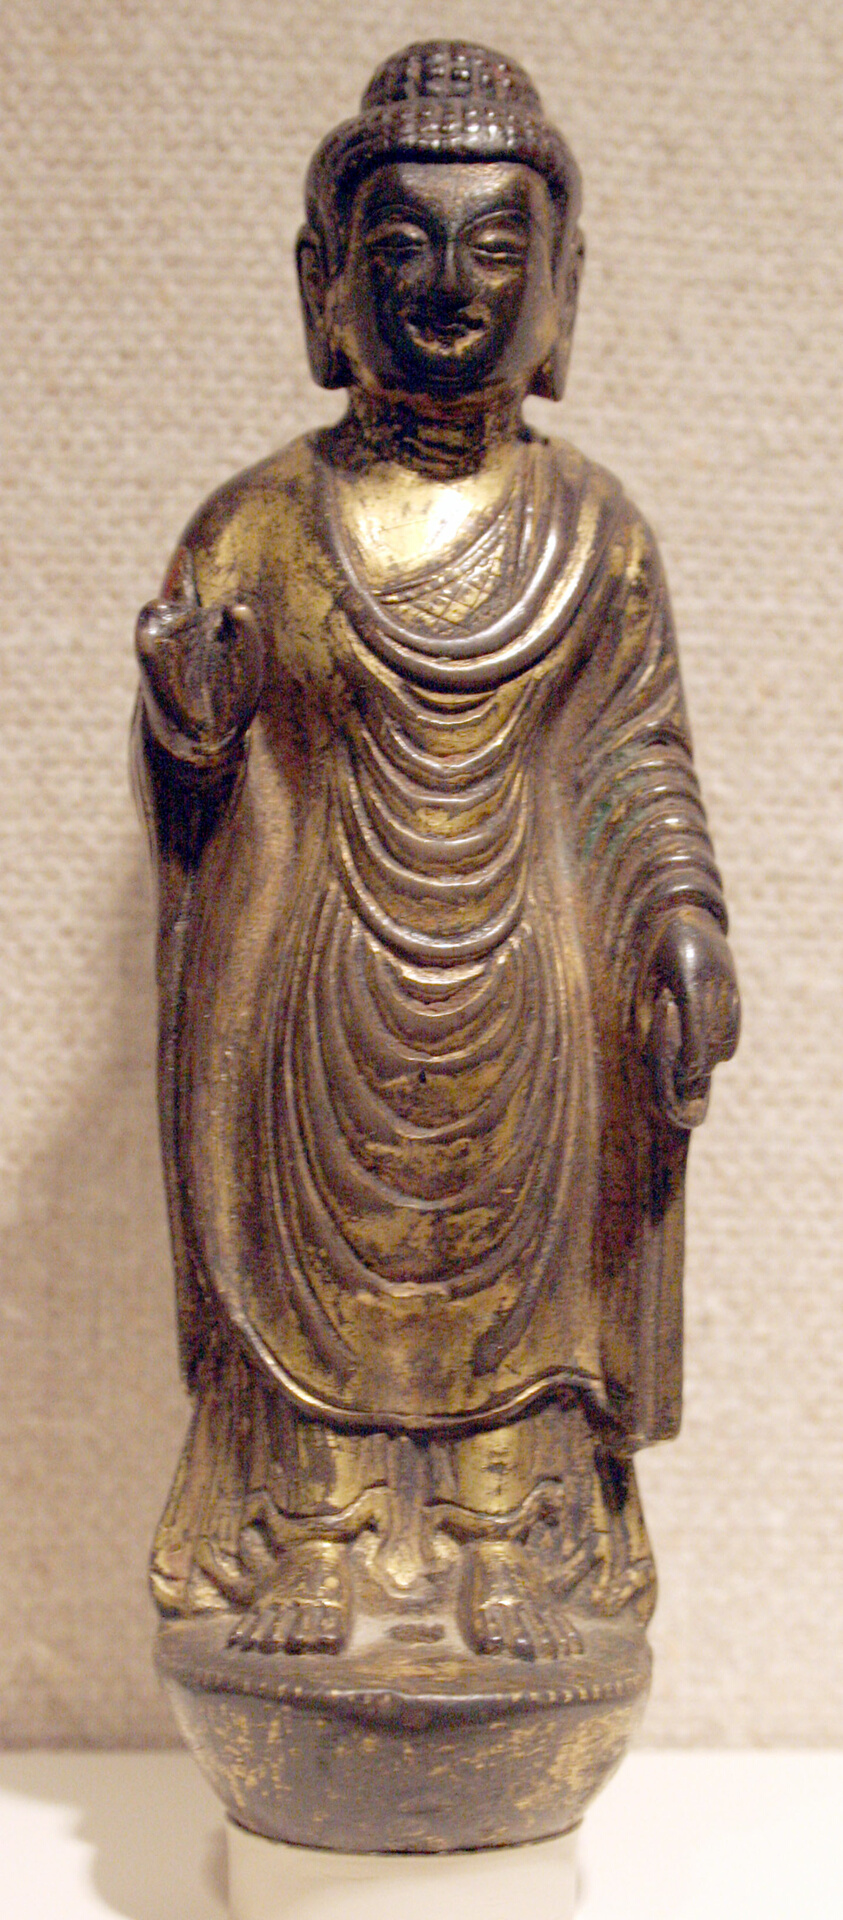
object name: Sculpture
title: Buddha, Standing with Hand in Gesture of Reassurance (Abhaymudra)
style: Chinese (culture or style)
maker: China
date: Tang dynasty, 618–907, 7th/8th century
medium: Gilt copper alloy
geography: China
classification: bronze; metal; sculpture; asian art